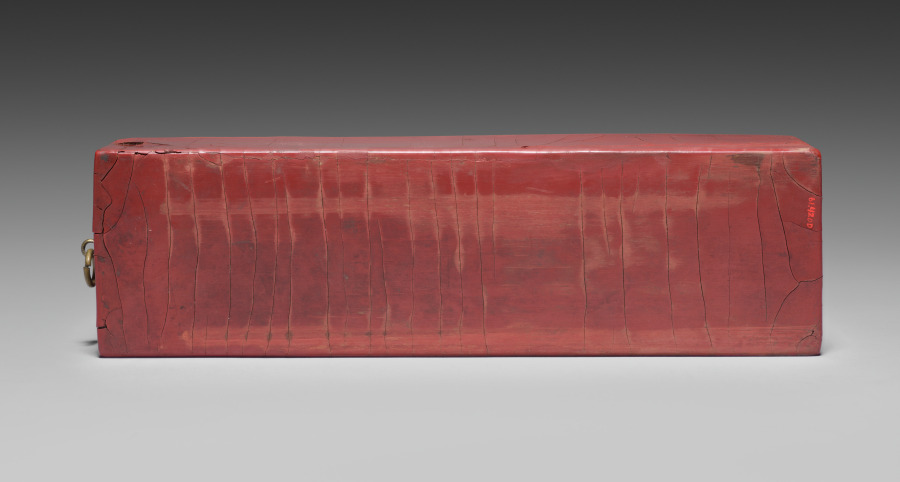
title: Drawer for a Tihong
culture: China, Ming dynasty (1368-1644), Wanli reign (1572-1620)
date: 1585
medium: carved cinnabar lacquer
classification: Lacquer